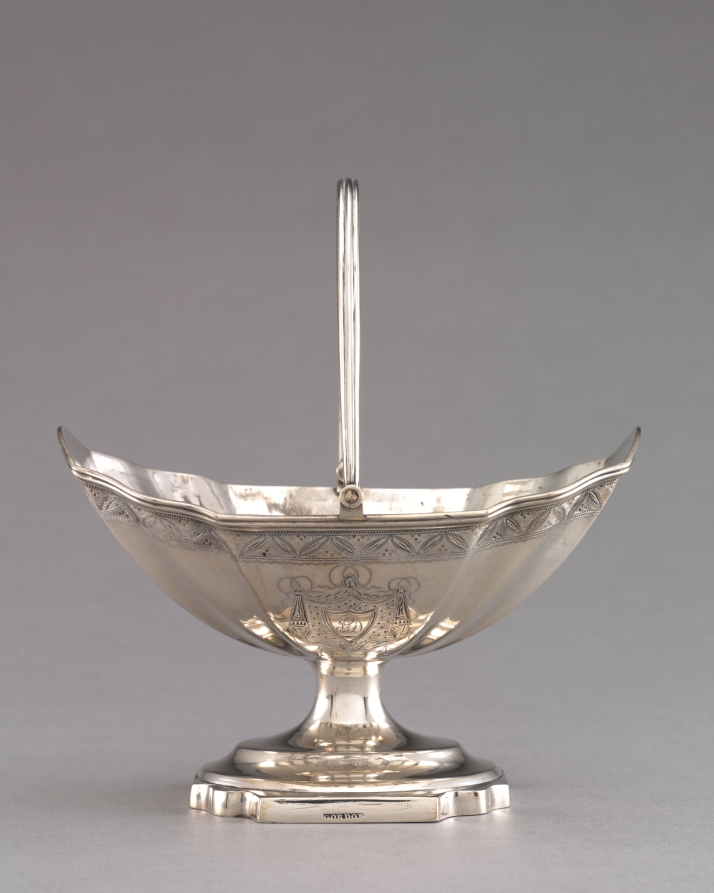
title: Sugar Basket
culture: America, New York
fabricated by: or Andrew Gordon (American)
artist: James Gordon (American)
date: c. 1796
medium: silver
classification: Silver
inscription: engraved in bright-cut script within a shield surrounded by mantlings on one side, and a bird with a branch within a corresponding shield on opposite side: JSD.